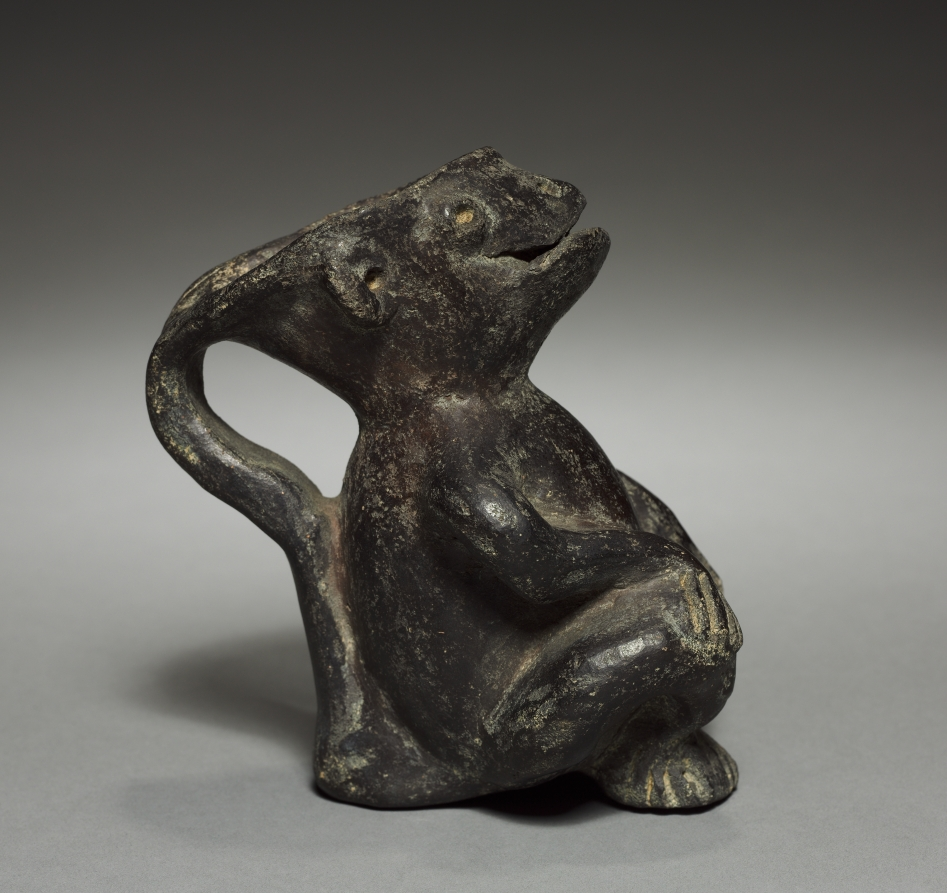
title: Seated Figure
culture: Colombia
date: before 1921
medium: pottery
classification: Ceramic